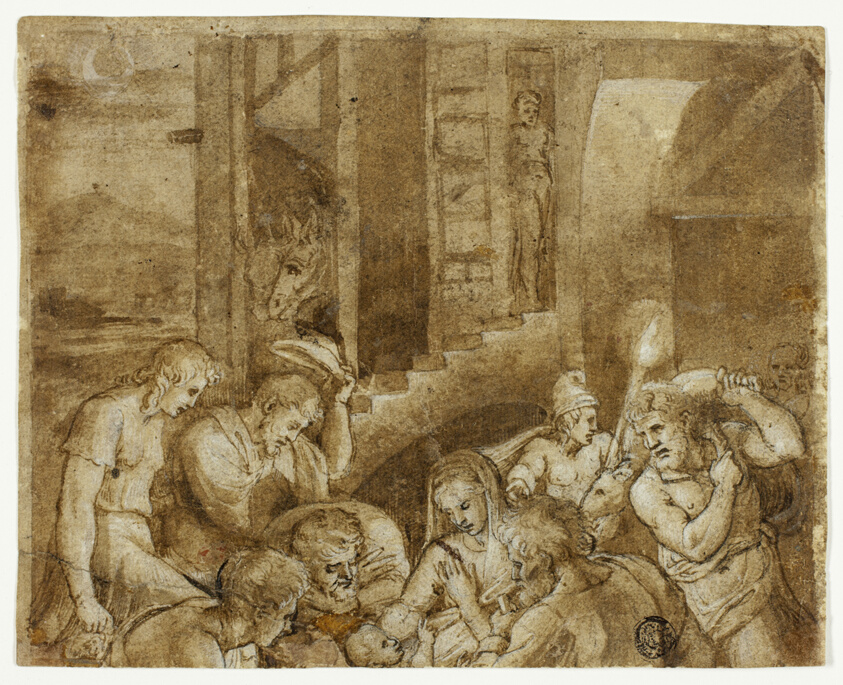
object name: Drawing and Watercolor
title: Adoration of the Shepherds: Upper Half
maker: After Giulio Pippi, called Giulio Romano; Italian, c. 1499-1546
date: 16th century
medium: Brush and brown ink, heightened with lead white (discolored), on tan laid paper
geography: Italy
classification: drawings (visual works); prints and drawing